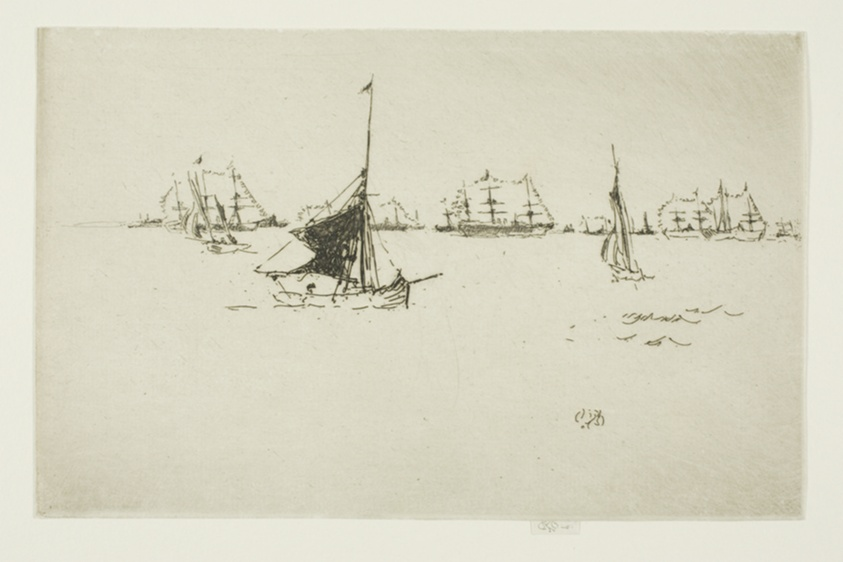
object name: Print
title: Her Majesty's Fleet: Evening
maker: James McNeill Whistler (American, 1834-1903)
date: 1887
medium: Etching and drypoint with foul biting in black ink on ivory laid paper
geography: United States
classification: etching; foul biting; print; prints and drawing; drypoint; paper